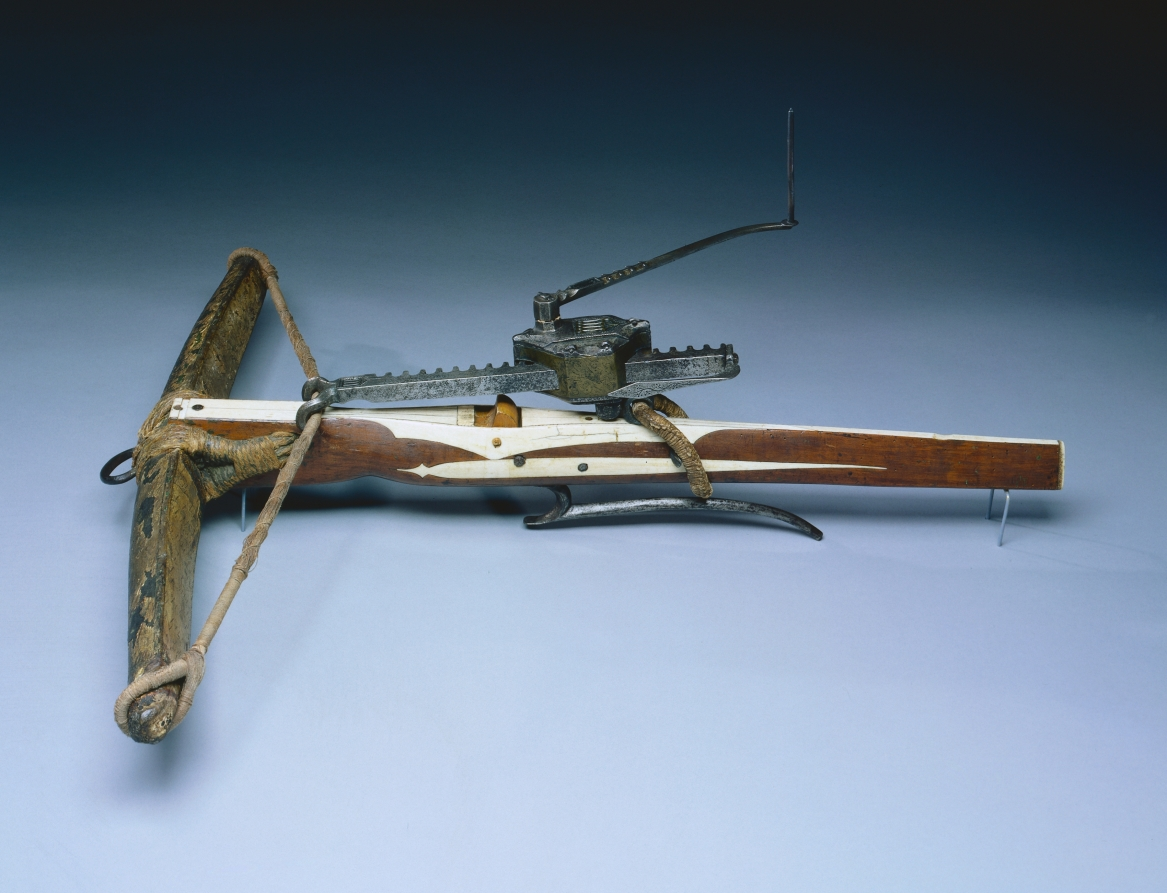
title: Crossbow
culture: Germany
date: c. 1460–70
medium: wood (walnut?) inlaid with bone; horn; iron and steel; composite bow (horn and parchment)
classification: Arms and Armor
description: The cranequin, or winding device sitting on top of the crossbow, made it easier to span for reloading. With a full quiver, a container for bolts and arrows, a hunter could bring home plenty of meat.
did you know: In every army in Europe crossbowmen were considered an elite corps, and as such occupied the central position in battle formations.